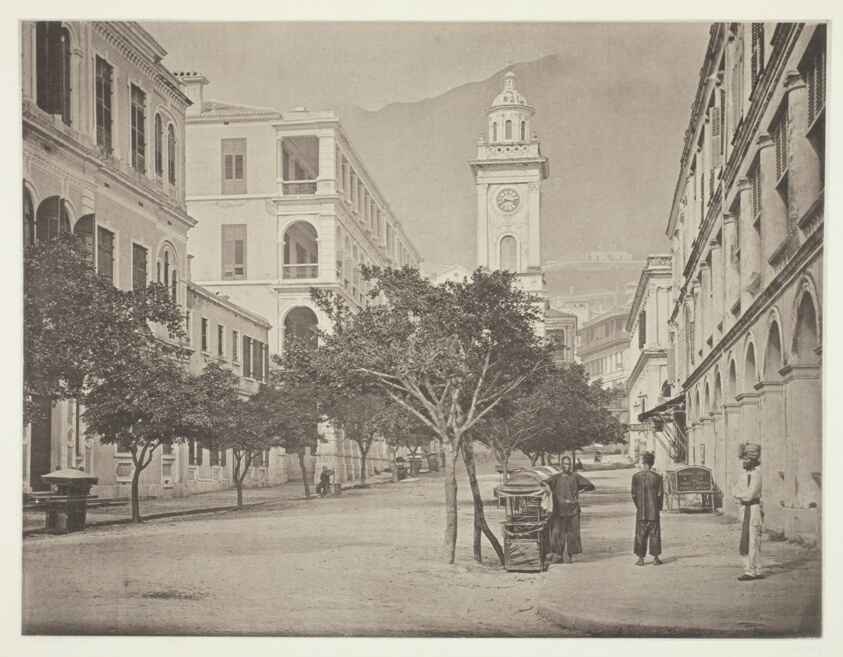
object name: Photograph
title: The Clock-Tower, Hong-Kong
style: 19th century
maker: John Thomson (Scottish, 1837–1921)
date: c. 1868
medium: Collotype, pl. V from the album "Illustrations of China and its People, Volume I" (1873)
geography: Scotland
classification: photography; photograph